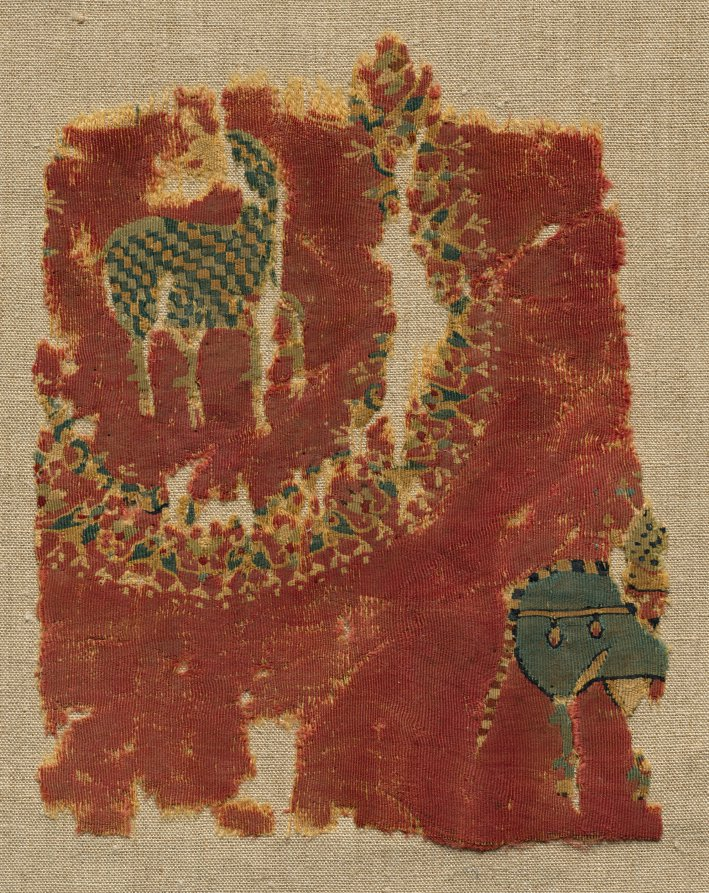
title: Hanging with foliate roundel and rider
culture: Iran or Iraq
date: 700s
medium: tapestry weave: wool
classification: Textile